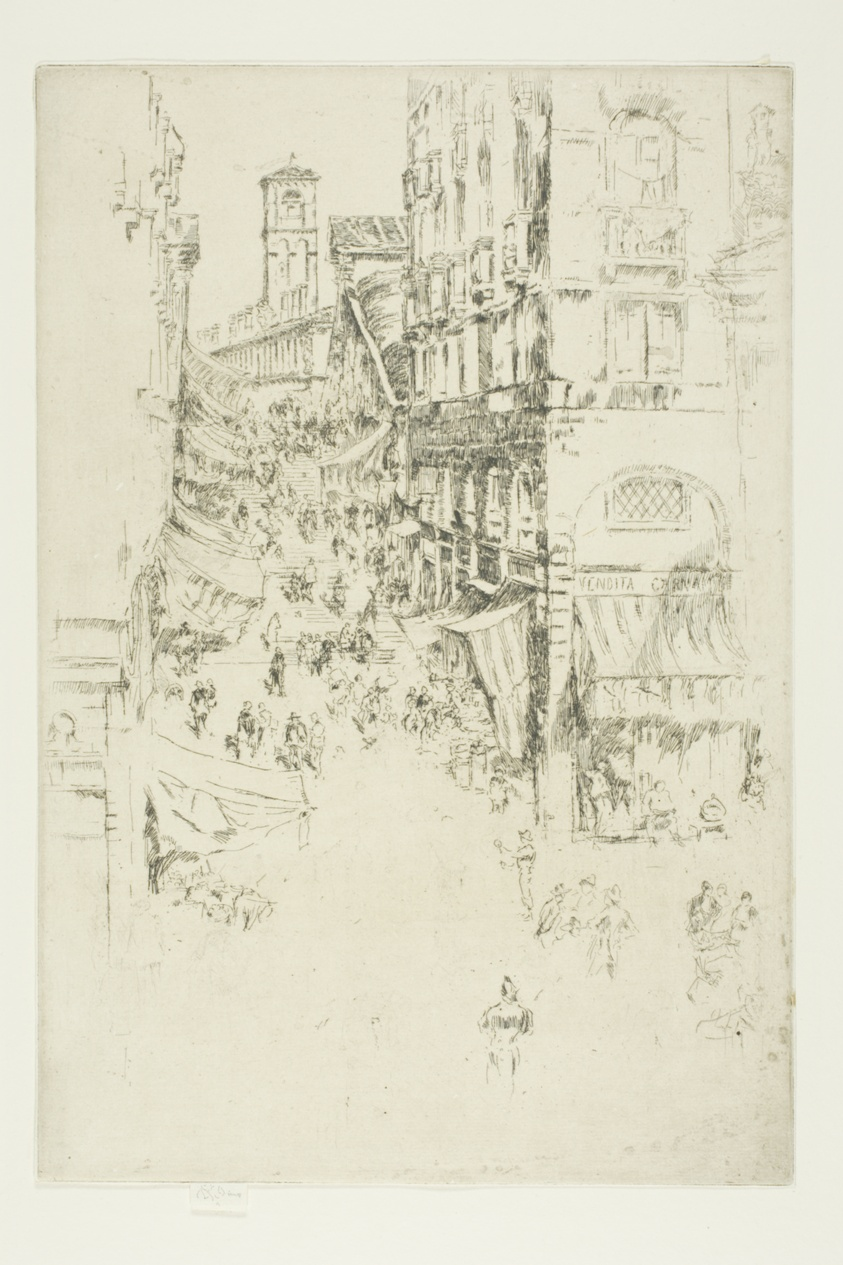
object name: Print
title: The Rialto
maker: James McNeill Whistler (American, 1834-1903)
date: 1879/80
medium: Etching with foul biting in black ink on ivory laid paper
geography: United States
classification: etching; foul biting; print; prints and drawing; paper